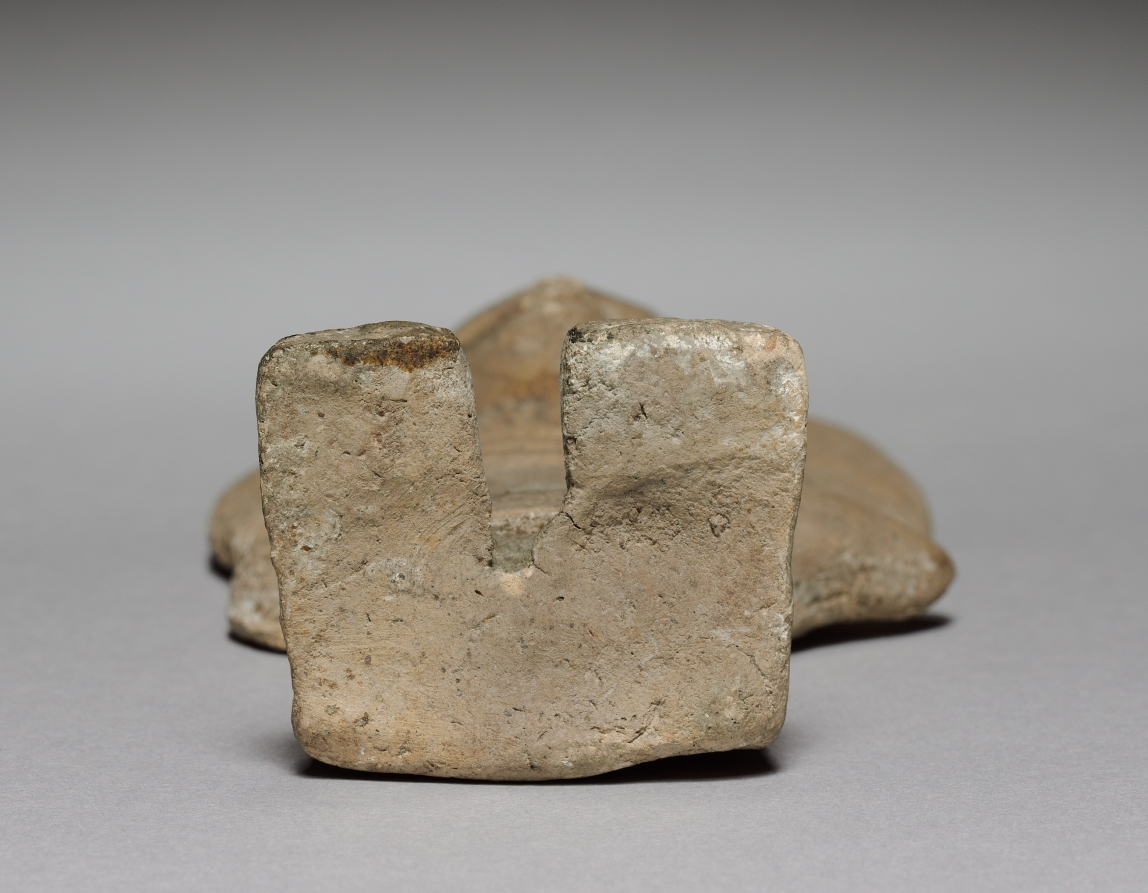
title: Figurine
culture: Mexico, Aztec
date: 1325–1521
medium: pottery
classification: Ceramic